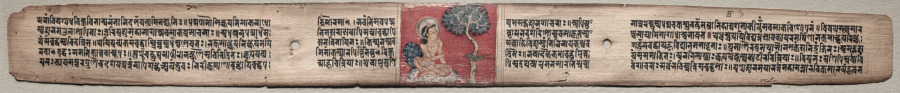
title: Sudhana and a parrot, folio 20 (recto) from a Gandavyuha-sutra (Scripture of the Supreme Array)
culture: Nepal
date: 1000–1100s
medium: gum tempera and ink on palm leaf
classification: Painting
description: On his quest to find teachers to guide him to enlightenment, the pilgrim Sudhana traveled alone through the wilderness. The tree and parrot indicate the forests of southern India. Graceful lines and vibrant color contribute to the enduring visual appeal of the paintings of this manuscript. In a stylistic convention of the time, the artist extended the "farther eye" beyond the contours of the face.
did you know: The parrot is actually an Indian ring-necked parakeet, with red beak and long tail.